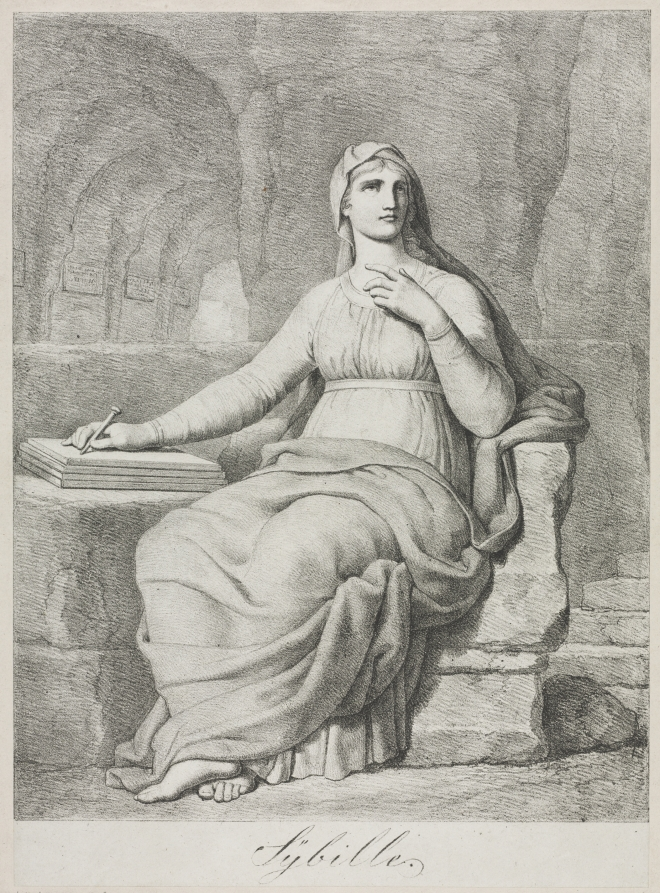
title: Sybille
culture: Germany, 19th century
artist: Simon Petrus Klotz (German, 1776–1824)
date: 1803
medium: lithograph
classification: Print